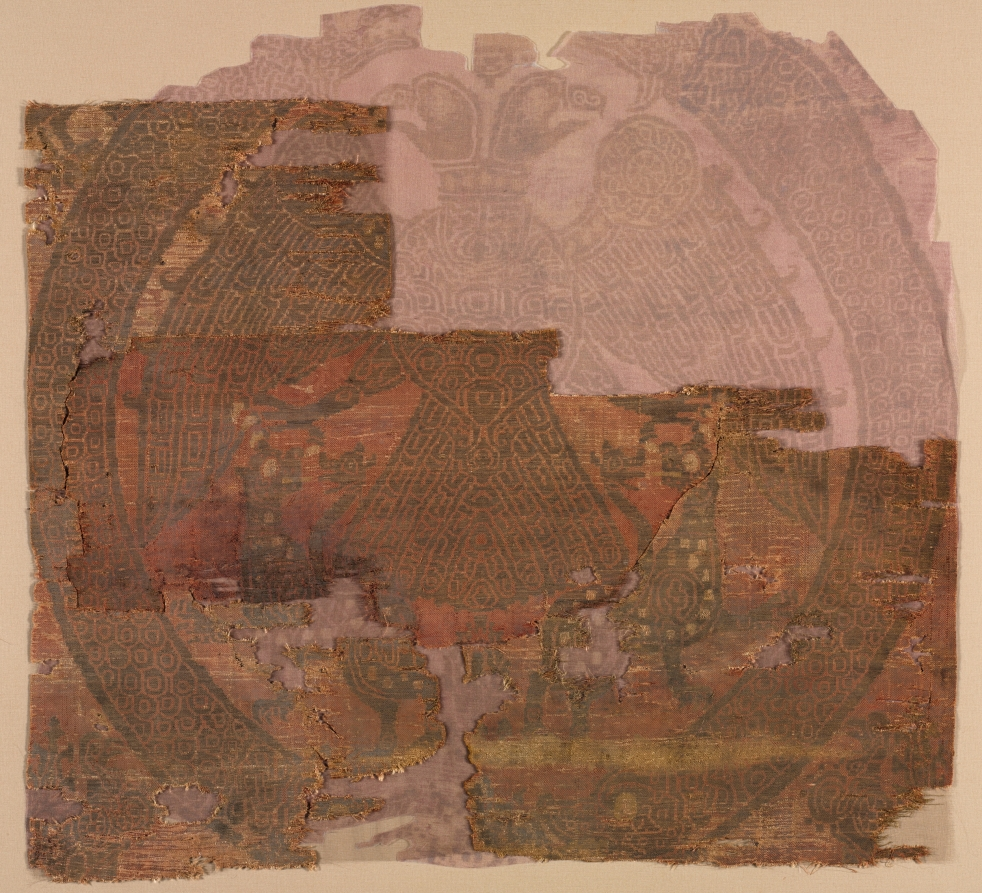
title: Fragment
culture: Byzantium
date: 900s–1000s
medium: Silk and gold: compound twill, brocaded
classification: Textile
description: The design of this textile offers an interesting iconographic puzzle. The double-headed eagle was a common motif in the art of the Near East in ancient times and from there seems to have found its way into Byzantine and European art. The animal tail ending in an animal's head is also found in Near Eastern art and is particularly noted in textiles of the Seljuk period (1000s–1100s) in Persia. However, the division of the roundel frame into two halves ending in animal heads is not known in the art of the Near East nor is the continuous knot motif which occurs just behind the animal head of the frames. Both of these motifs are familiar in the art of the Anglo-Saxon, Germanic, and Scandinavian peoples of Europe.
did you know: The entire pattern is in gold thread, except for such minor details as claws and eyes which are in golden tan silk on a rose-red ground.